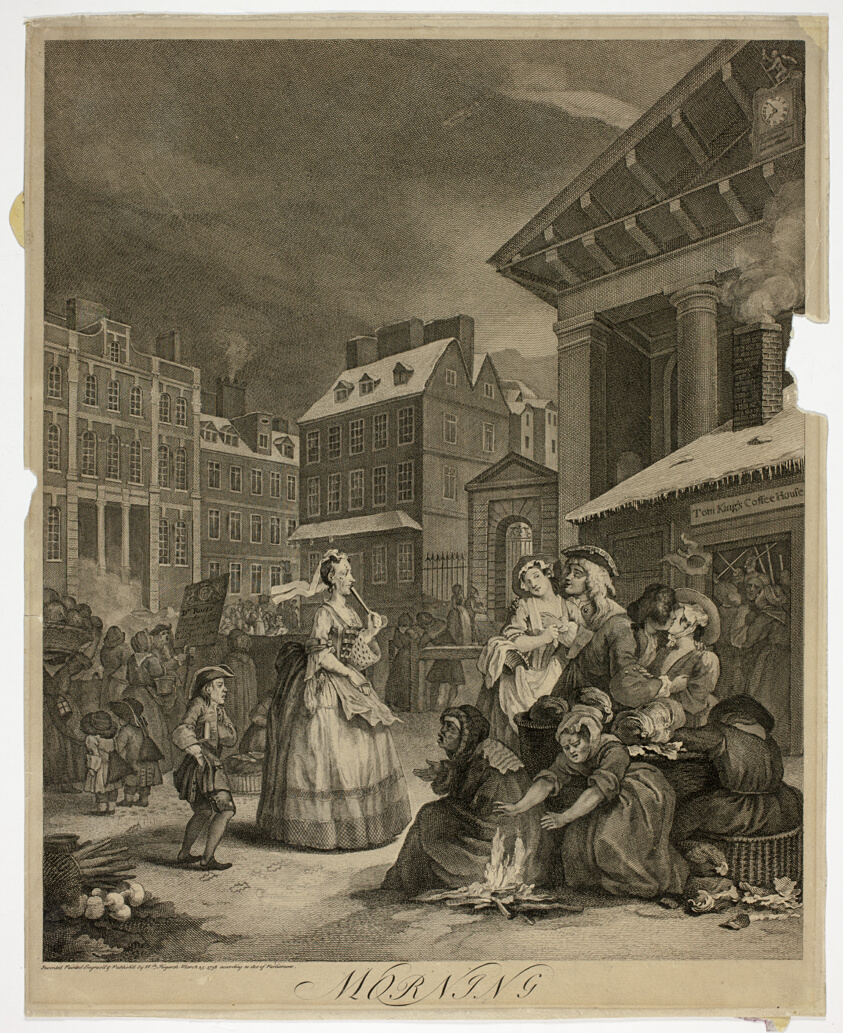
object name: Print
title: Morning, Plate One from The Four Times of Day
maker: William Hogarth (English, 1697-1764)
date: 1738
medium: Etching and engraving in black on cream laid paper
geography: England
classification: etching; print; prints and drawing